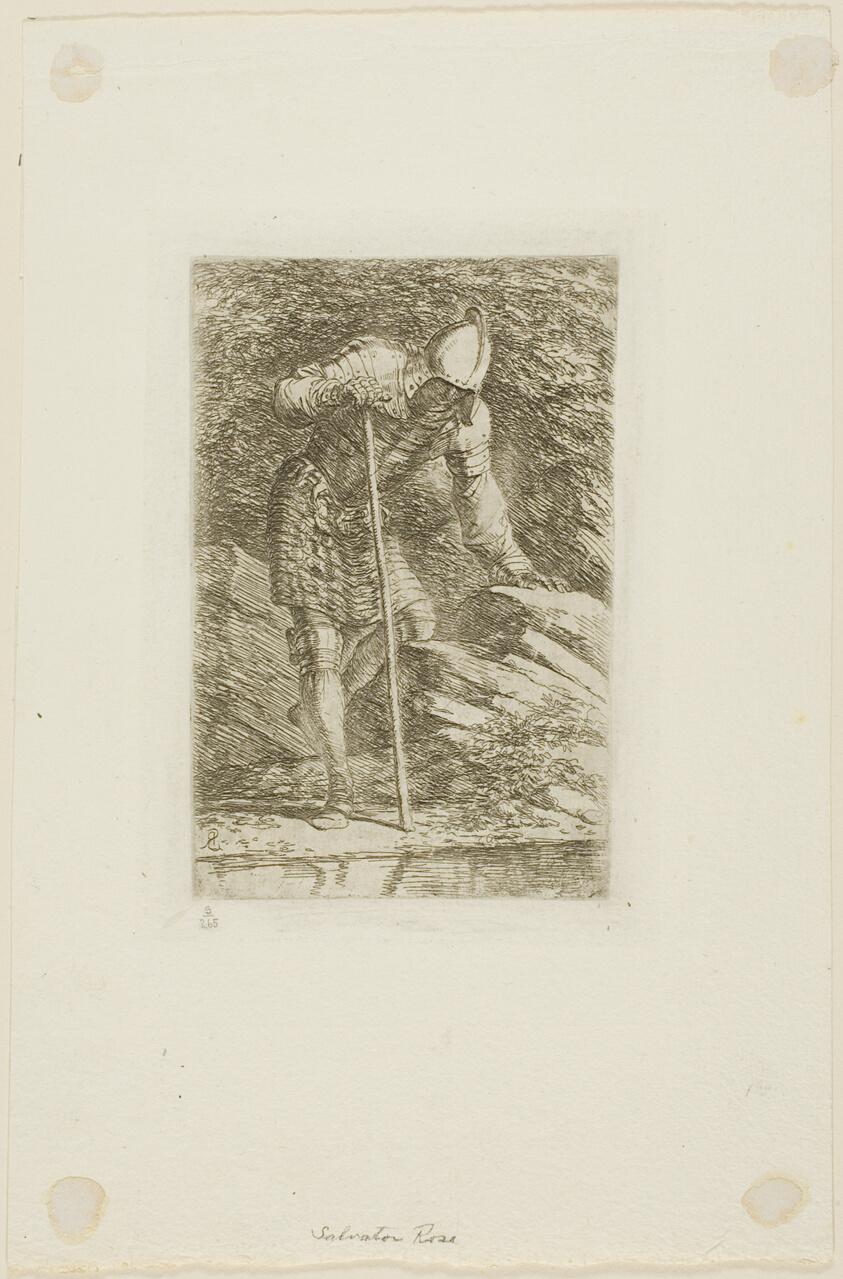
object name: Print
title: A Warrior in Full Armor in a Grotto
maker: Salvator Rosa (Italian, 1615-1673)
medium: Etching with drypoint on ivory laid paper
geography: Italy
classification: etching; print; prints and drawing